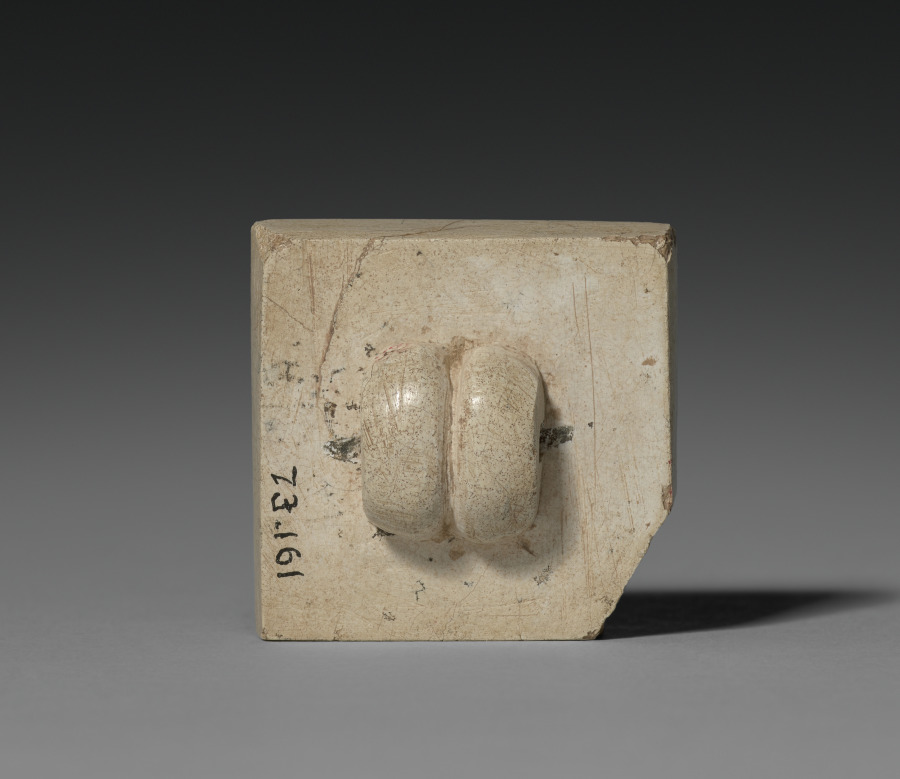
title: Seal with Unicorn and Inscription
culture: Pakistan, Indus Valley civilization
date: c. 2000 BCE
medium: steatite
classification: Seals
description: Indus Valley seals appear to have been hung on a string that passed through a boss on the reverse side. This animal, carved with detailed markings around his neck and forequarters, has his head positioned over an object on a stand that may be interpreted as an altar or brazier or censer; it is not known whether it is for offerings to or sacrifice of the animal.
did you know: Specialists disagree as to whether single-horned bovines actually lived during the time of the Indus Valley Civilization, four thousand years ago.